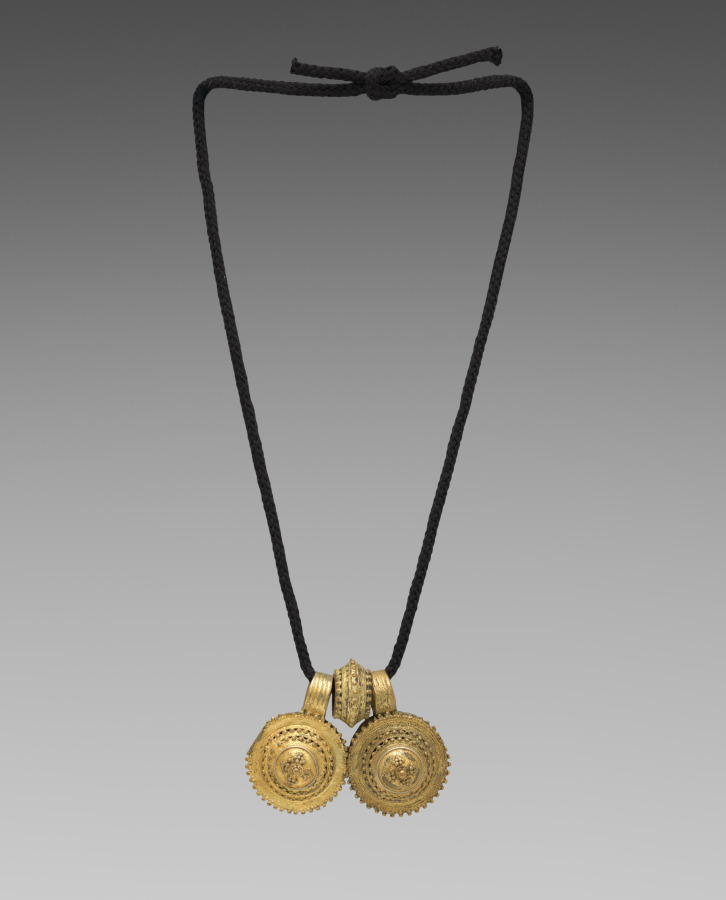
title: Necklace (ashän ketab) with amulet pendants (tälsäm) and bead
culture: Africa, East Africa, Ethiopia, unknown silversmith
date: late 1800s or early 1900s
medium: mercury-gilded copper alloy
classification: Jewelry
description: Ornate filigree jewelry was historically made in Ethiopia for royals and nobility by specialized silversmiths trained through long apprenticeships. This gold-washed silver necklace is composed of numerous box-shaped amulet pendants (tälsäm) meant to ward off the evil eye or other dangers. Linked to Islamic amuletic practices, the boxes are effective whether empty or whether they contain magical or prayerful texts. Their fine filigree and granulation work is characteristic of Harar as well as the Ethiopian Orthodox Christian city of Aksum.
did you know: Gold and silver jewelry has been made in Ethiopia for at least 2000 years.